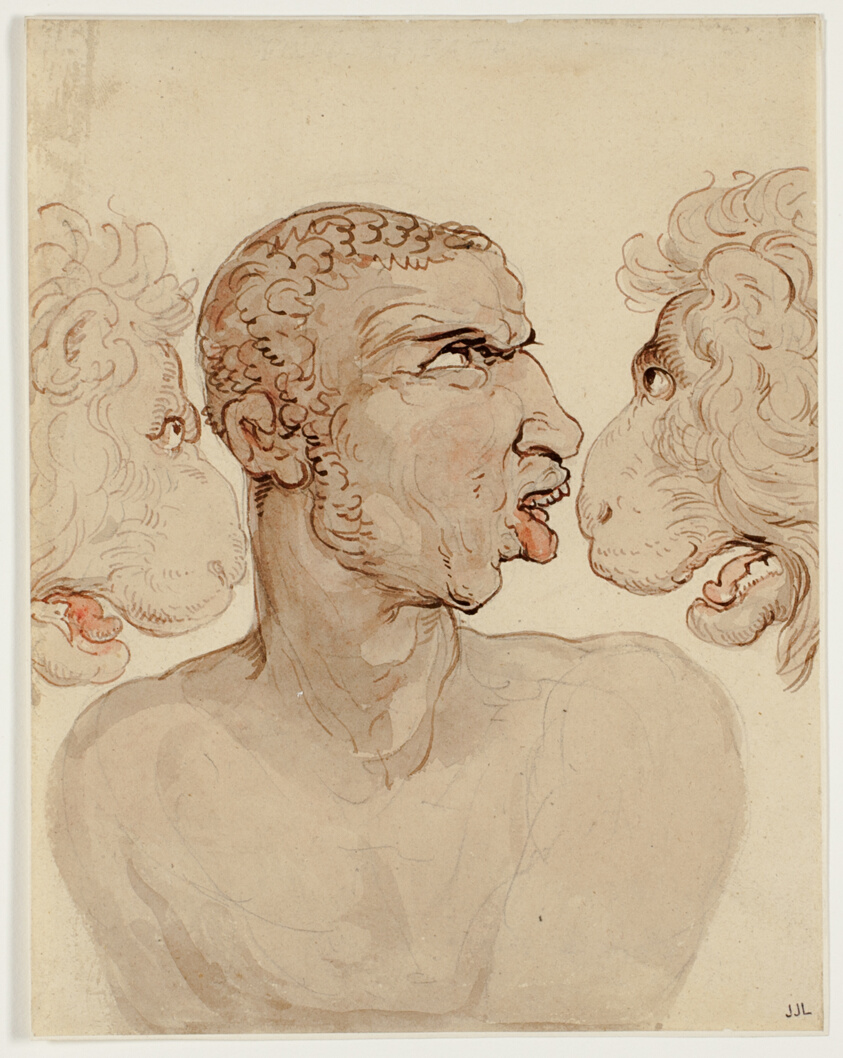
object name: Drawing and Watercolor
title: Physiognomic Study of the Head of a Man and Two Lions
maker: Thomas Rowlandson (English, 1756-1827)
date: c. 1822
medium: Pen and brush with brown wash, over traces of graphite, on ivory wove paper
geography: England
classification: watercolor; drawings (visual works); prints and drawing